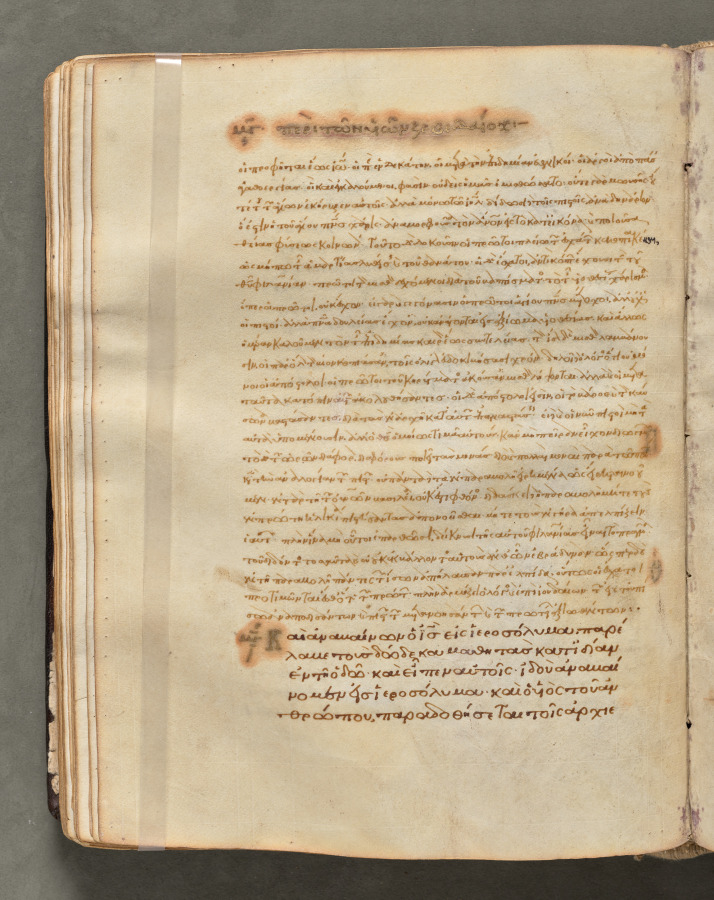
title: Text, folio 88 (verso), from a Gospel Book with Commentaries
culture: Byzantium, Constantinople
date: c. 1000–1100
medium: ink, tempera, and gold on vellum; leather binding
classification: Bound Volume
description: Each of the four gospels in this book opens on a page with brilliantly illuminated borders depicting the author of the text as well as birds-principally peacocks, symbols of the immortality of the soul-and fountains, representing the fountain of life and the salvation of the soul. This volume consists of 428 leaves with texts in Greek. Its level of sophistication suggests that it was probably written and decorated in a monastery in Constantinople.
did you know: Gospel Books were carried in procession through Byzantine churches.